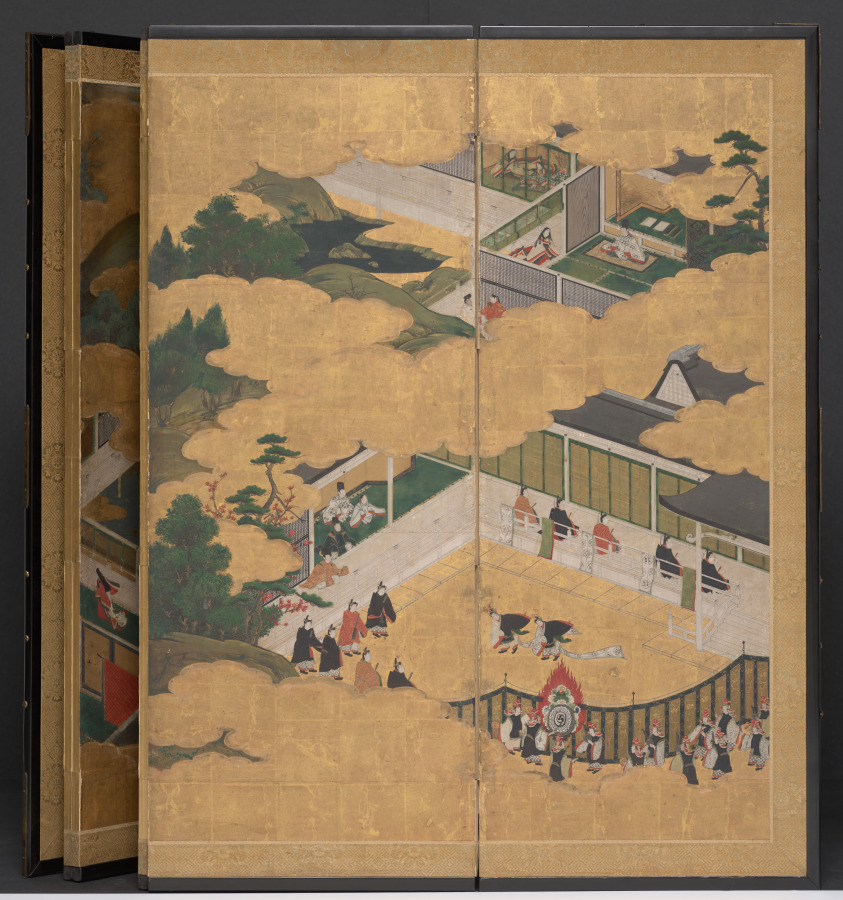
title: Scenes from the Tale of Genji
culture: Japan, Edo period (1615–1868)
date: 1700s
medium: Six-panel folding screen; ink, color, gold and gilding on paper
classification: Painting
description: Folding screens served as temporary dividers in traditional Japanese open-plan architectural spaces. This screen was inspired by Japan’s most celebrated work of literature, the Tale of Genji, written by Murasaki Shikibu, an attendant to the empress in the early 11th-century imperial court. The novel follows the love life of the “Shining Prince” Genji and delves into the psychological states of his many companions.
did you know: Distinct episodes are nestled within a matrix of golden clouds and landscape elements.